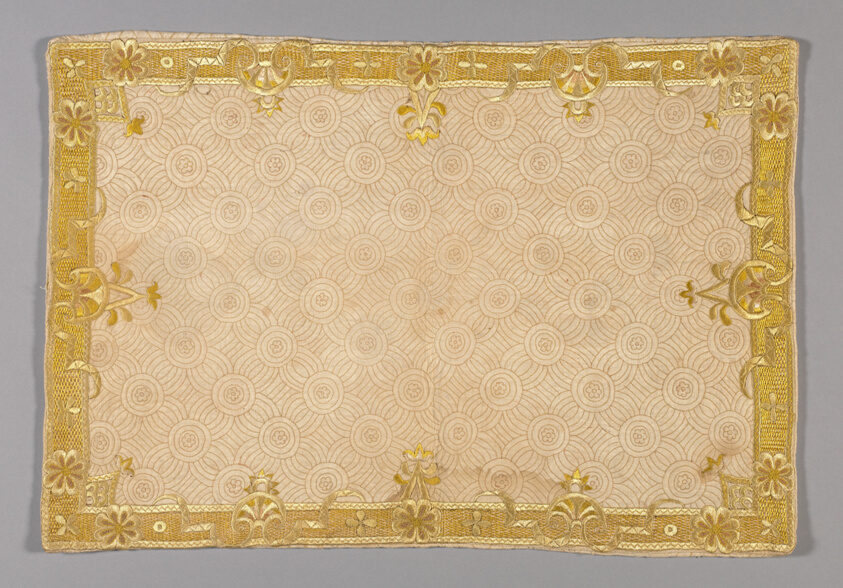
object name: Textile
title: Pillow Sham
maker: England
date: c.1720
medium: Cotton, plain weave, underlaid with linen, plain weave; embroidered with silk floss and silk yarns in back, herringbone, individual satin, and satin stitches; laid work, couching, and French knots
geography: England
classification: textile; needlework (visual works)